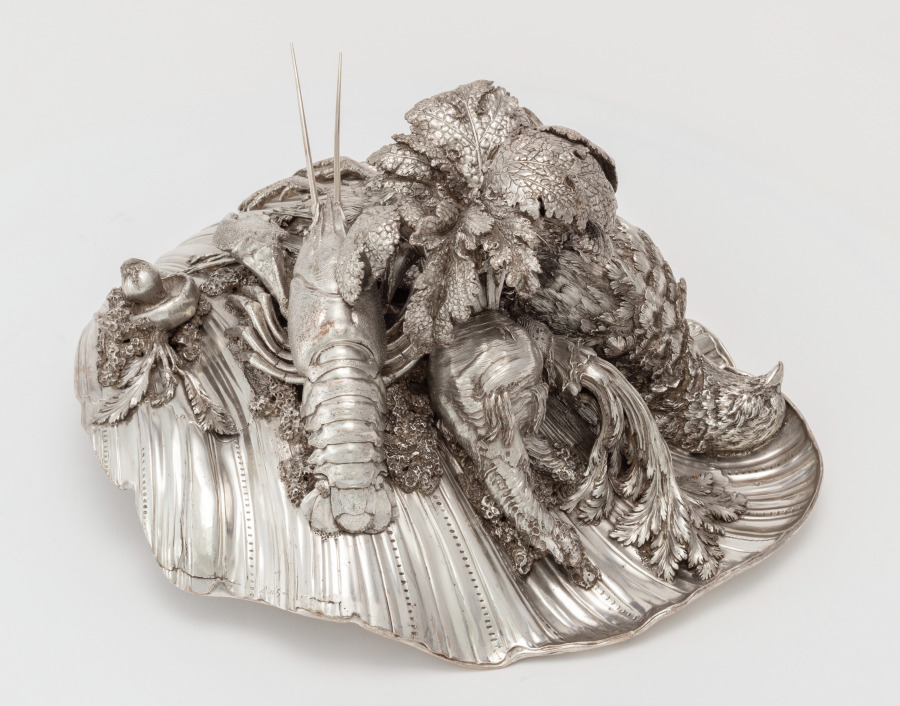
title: Cover for a Tureen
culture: France, Paris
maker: Henry Adnet (French, 1745)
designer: Juste-Aurèle Meissonnier (French, 1695–1750)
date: 1735–38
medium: silver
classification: Silver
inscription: engraved Meissonnier signature.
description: See entry for cover record 1977.182.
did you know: The langoustine, pigeon, and vegetables were cast using real examples giving the silver copies lifelike detail and appearance.